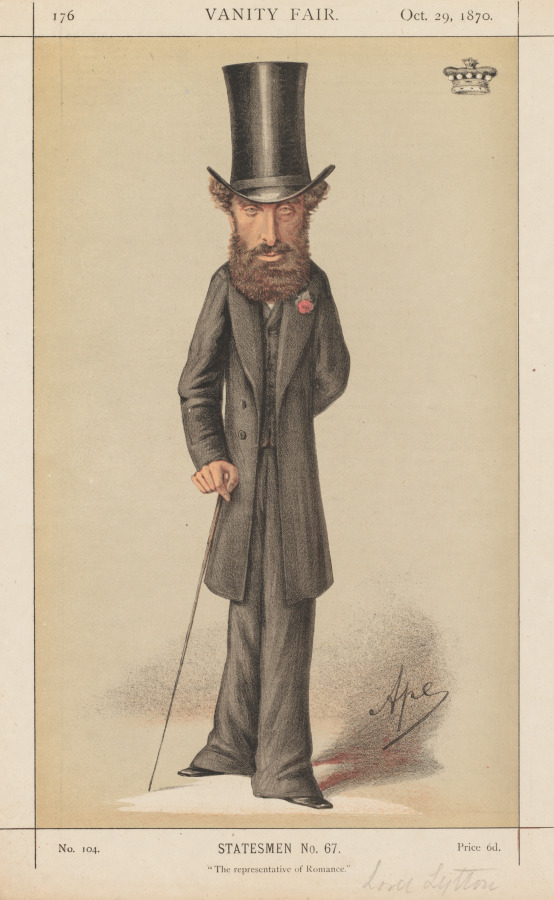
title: Vanity Fair: Statesmen No. 67 "The representative of Romance"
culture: Italy, 19th century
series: published in Vanity Fair Oct. 29, 1870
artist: Carlo (Ape) Pellegrini (Italian, 1839–1889)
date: 1870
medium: color lithograph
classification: Print